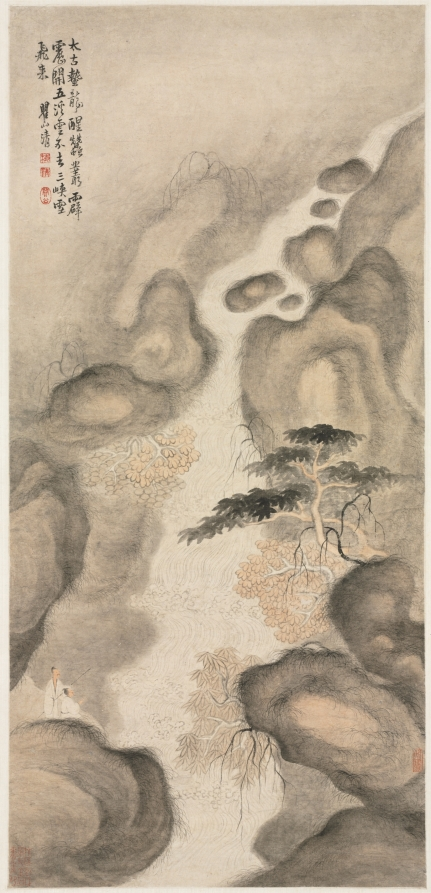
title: Nine Dragon Pool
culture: China, Qing dynasty (1644-1911)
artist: Mei Qing (Chinese, 1623–1697)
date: 1690s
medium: hanging scroll, ink and light color on paper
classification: Painting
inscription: 太古蟄龍醒，蠺叢霹靂開。 五溪雲不去，三峽雪飛來。 瞿山, 清。 [印] 梅清; 淵公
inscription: 2 additional seals: 1 of Dai Xi 戴煕 (1801–1860); 1 unidentified.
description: In the second half of the 1600s, Huangshan 黃山 (Mt. Huang or Yellow Mountain) attracted many visitors and inspired artists like Mei Qing. He probably sketched the Nine Dragon Pool on his second trip to the mountain range in 1690, at the advanced age of 68 sui. This dramatic waterfall has nine curves, each forming an emerald green pool. After heavy rain, the rushing water looks like nine white dragons.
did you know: Huangshan 黃山 is a UNESCO World Heritage site known for its spectacular rocky peaks, sea of clouds, oddly shaped pine trees, and hot springs.